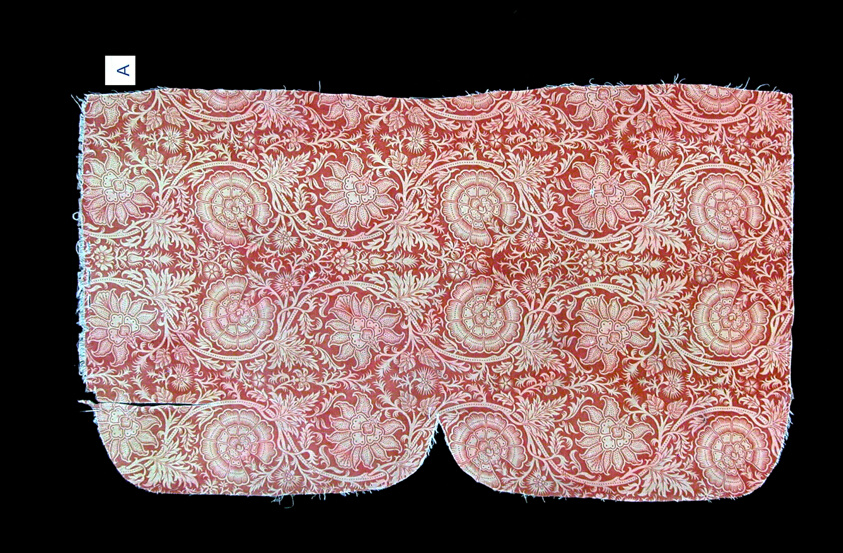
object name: Textile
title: Fragment of a Chair Seat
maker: Designed by Thomas Wardle (English, 1831–1909); Printed at Hencroft Dye Works; England, Staffordshire, Leek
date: c. 1888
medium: Cotton, twill weave with supplementary pile wefts forming cut solid (velveteen); block printed; fringe: cotton, silk and wool; woven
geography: England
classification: textile; weaving - printed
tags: Chicago